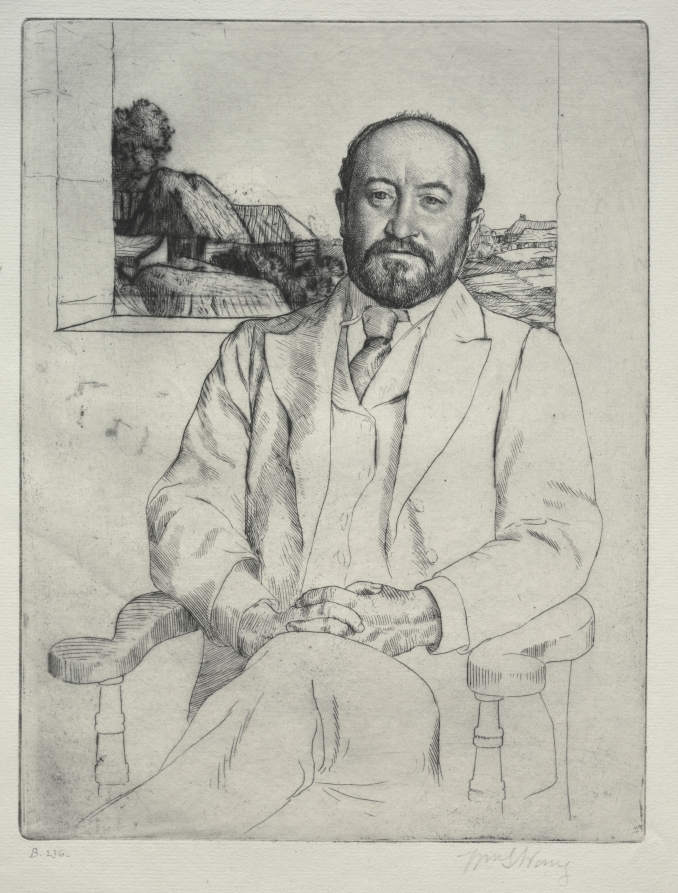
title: C. J. Knowles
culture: England, late 19th Century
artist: William Strang (British, 1859–1921)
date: 1894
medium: etching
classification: Print